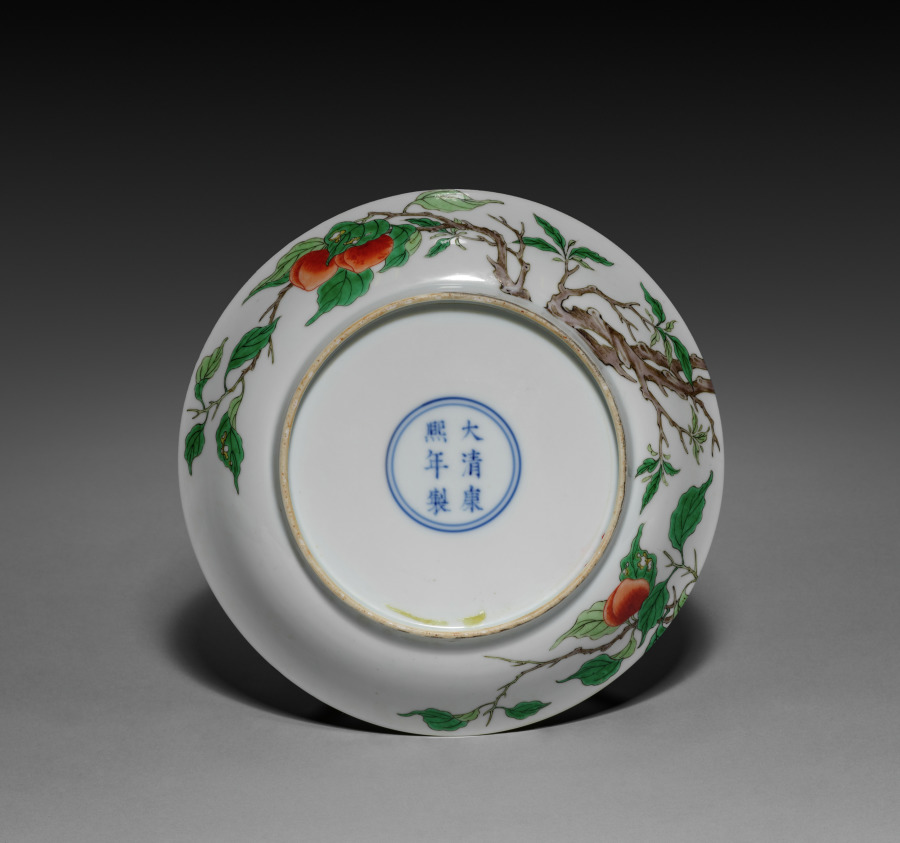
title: Dish with Bird on Fruit Tree Branch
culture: China, Jiangxi province, Jingdezhen kilns, Qing dynasty (1644–1911), Kangxi mark and reign (1662–1722)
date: 1662–1722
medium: Porcelain with famille-verte overglaze enamel decoration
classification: Ceramic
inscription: 大清康熙年制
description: Among the greatest achievements of early Qing porcelain are table wares and display objects decorated with polychrome painting like this pair of dishes. Featuring birds perched in peach trees, the dishes are related to the famous birthday set commissioned for the Kangxi emperor’s sixtieth birthday in 1713. These pieces are more inventive than those in the 1713 set, however, since the unframed ornament is allowed to continue unbroken from the outer to inner surfaces and back out again, thus transforming each vessel into a three-dimensional canvas.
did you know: By the early eighteenth century, the imperial kilns at Jingdezhen were producing exceptionally fine pieces on a staggering scale.